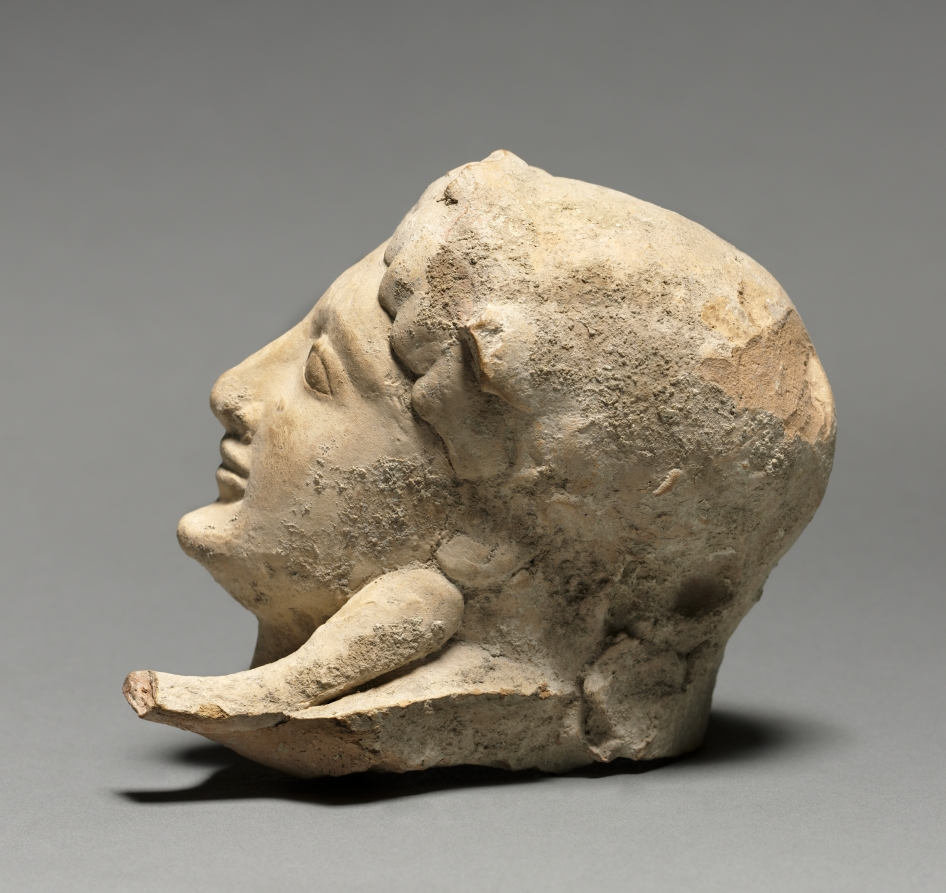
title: Head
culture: Greece, Sicily, Selinus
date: 525 BCE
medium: terracotta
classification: Sculpture